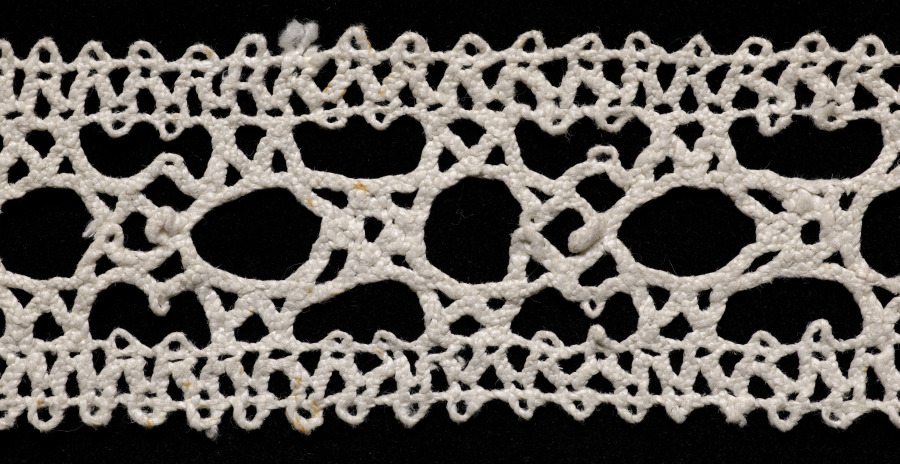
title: Lace Insertion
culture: Italy, Venice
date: 1540–60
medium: Bobbin lace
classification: Lace